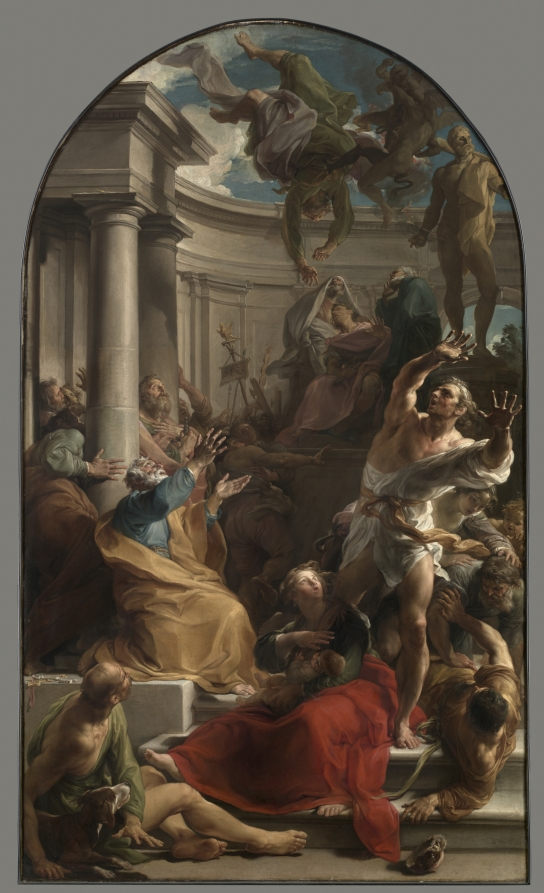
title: The Fall of Simon Magus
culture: Italy, 18th century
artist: studio of Pompeo Batoni (Italian, 1708–1787)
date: c. 1745–50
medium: oil on canvas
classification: Painting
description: Saints Peter and Paul came to Rome to win converts to Christianity soon after Christ’s death, while Simon Magus, claiming to be the son of God, attempted to prove his divinity by flying. Due to Saint Peter’s prayers, the demons supporting Simon abandoned him and he plummeted to his death. This work is probably a studio copy after a lost oil sketch for a huge altarpiece commissioned in 1746 for Saint Peter’s Basilica at the Vatican. Because of the humidity in Saint Peter’s, which quickly ruined paintings, the work was to have been translated into a massive mosaic. However, for reasons that remain unclear, Batoni’s mosaic was never created.